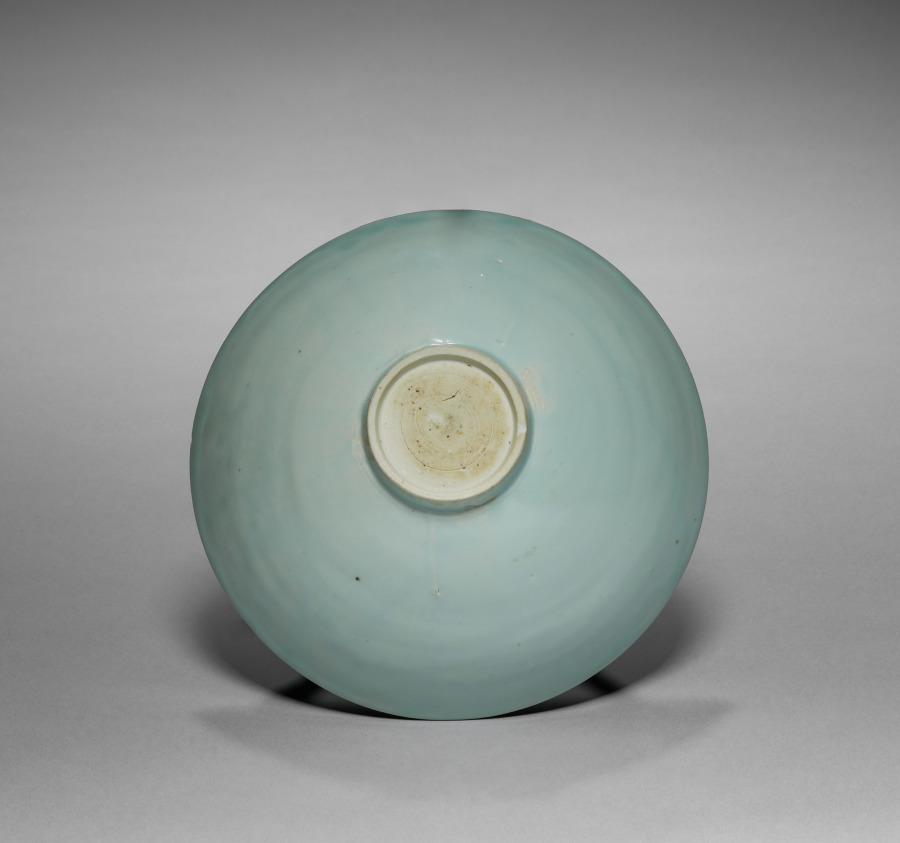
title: Bowl with Carved Design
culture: South China, Southern Song dynasty (1127–1279)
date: 1100s–1200s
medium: Porcelain with pale bluish-white (qingbai) glaze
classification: Ceramic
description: This conical bowl and the shallow and wide one (CMA 2020.183) are both hand-incised with decoration suggesting waves, clouds, or floral sprays. All of these motifs had auspicious meaning: waves and clouds bring rain that fertilizes the fields, and flowers and plants were often associated with the beauty of human virtues. The carved and combed designs were swiftly cut with a wooden tool into the unfired leather-hard body before glazing. Once the glaze was applied, it pooled in the incised areas rendering the design more visible.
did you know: Never intended for imperial use, qingbai ware was among the first mass-produced porcelain types and became a popular export.